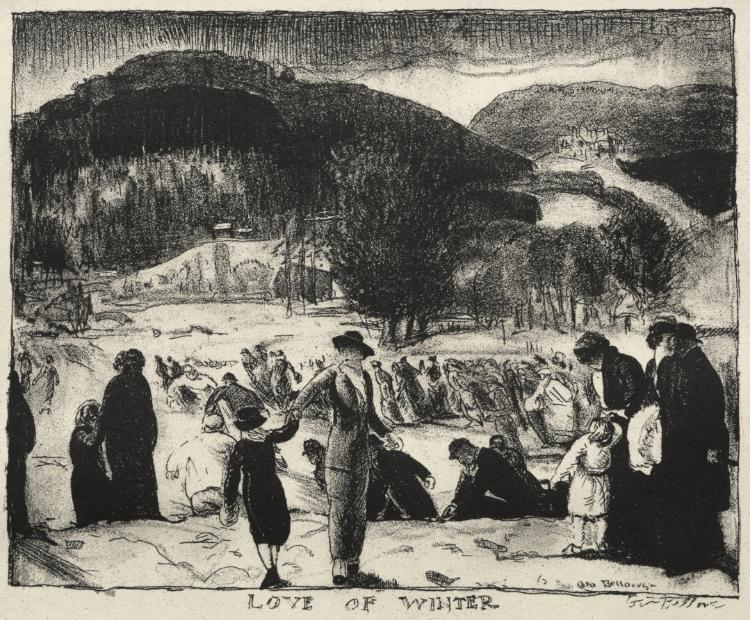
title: Love of Winter, Christmas 1917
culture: America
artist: George Bellows (American, 1882–1925)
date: 1923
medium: lithograph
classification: Print